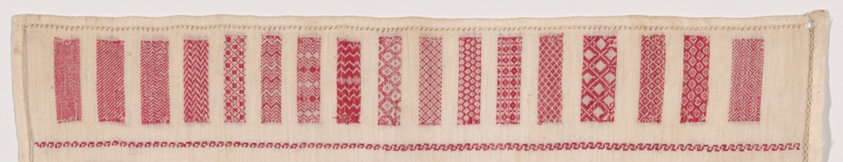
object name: Textile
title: Darning Sampler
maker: Netherlands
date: 1808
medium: Cotton, plain weave; embroidered in darning and cross stitches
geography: Netherlands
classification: textile; needlework (visual works); sampler